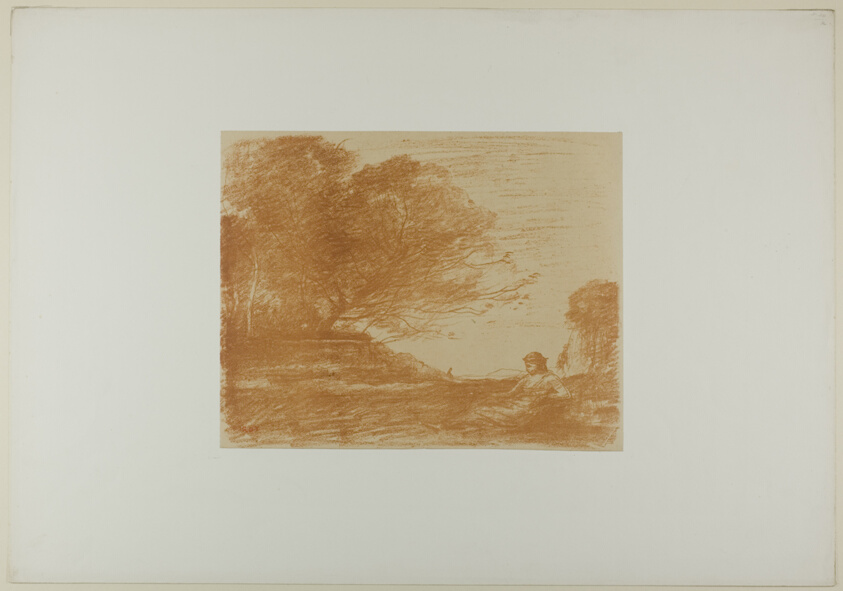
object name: Print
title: Sappho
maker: Jean-Baptiste-Camille Corot; French, 1796-1875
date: 1871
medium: Transfer lithograph printed in reddish-brown on cream China paper laid down on white wove paper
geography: France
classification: lithograph; print; prints and drawing